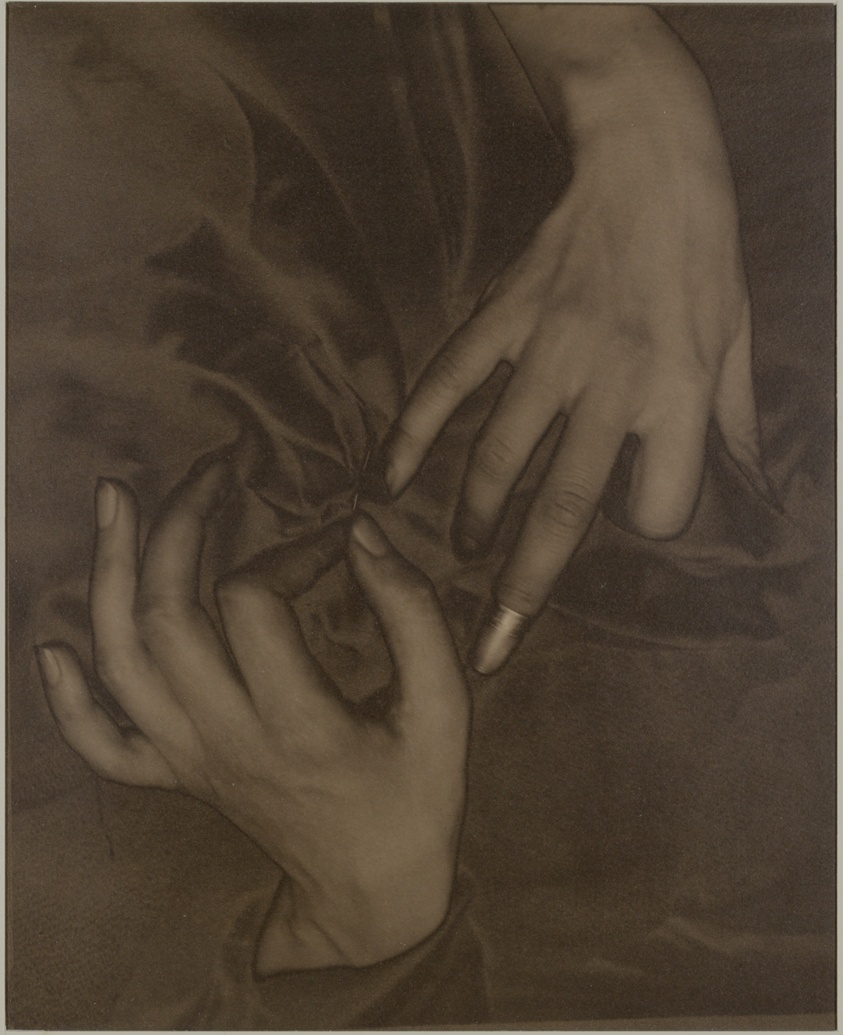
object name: Photograph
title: Georgia O'Keeffe—Hands and Thimble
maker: Alfred Stieglitz (American, 1864–1946)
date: 1919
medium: Palladium print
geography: United States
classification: palladium print; photographic process; photography; photograph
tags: hands, thimbles, sewing